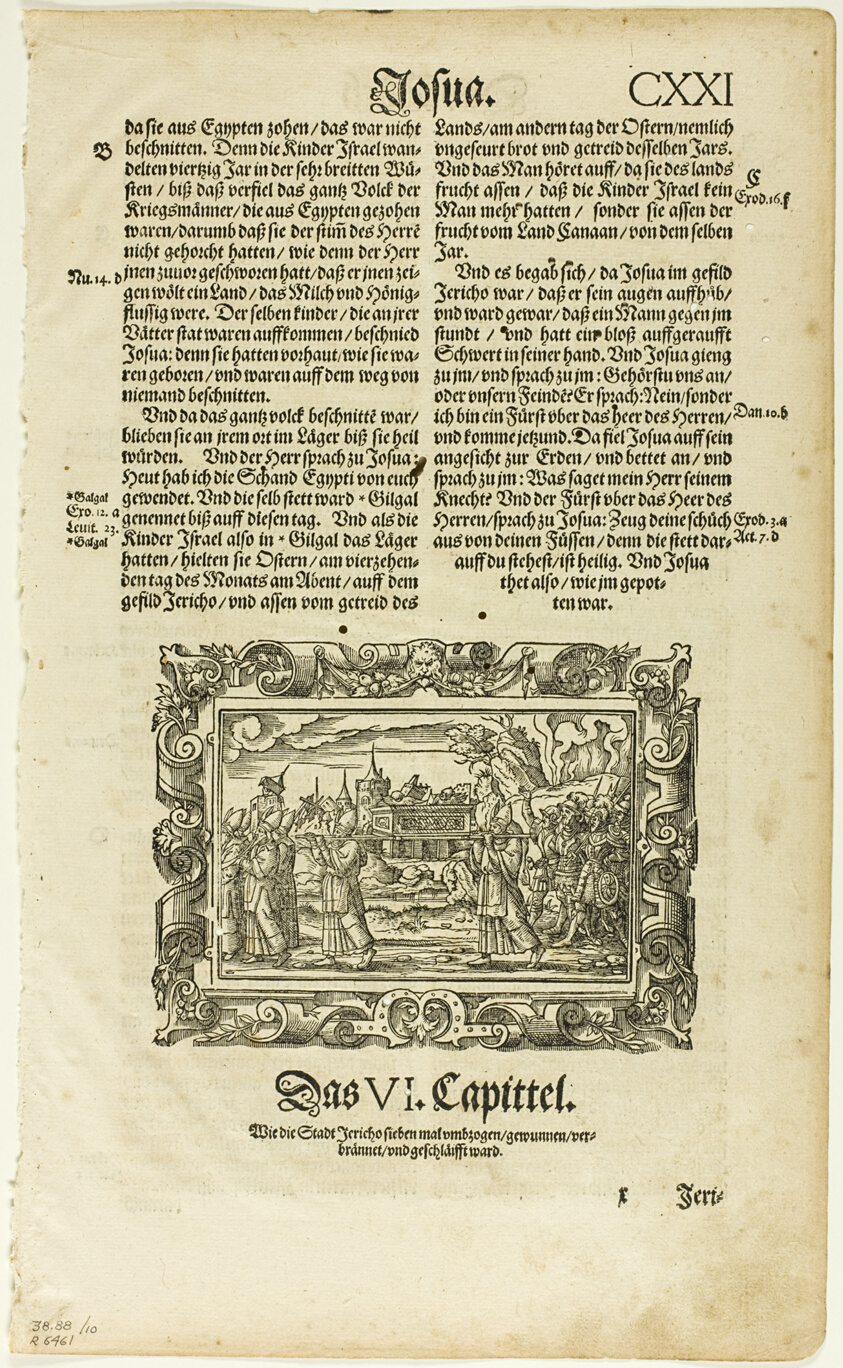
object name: Print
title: The Taking of Jericho from Catholische Bibell, plate ten from Woodcuts from Books of the XVI Century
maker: Virgil Solis, the elder (German, 1514-1562); assembled by Max Geisberg (Swiss, 1875-1943)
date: 1564, assembled into portfolio 1937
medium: Woodcut on paper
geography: Germany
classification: woodcut; print; prints and drawing